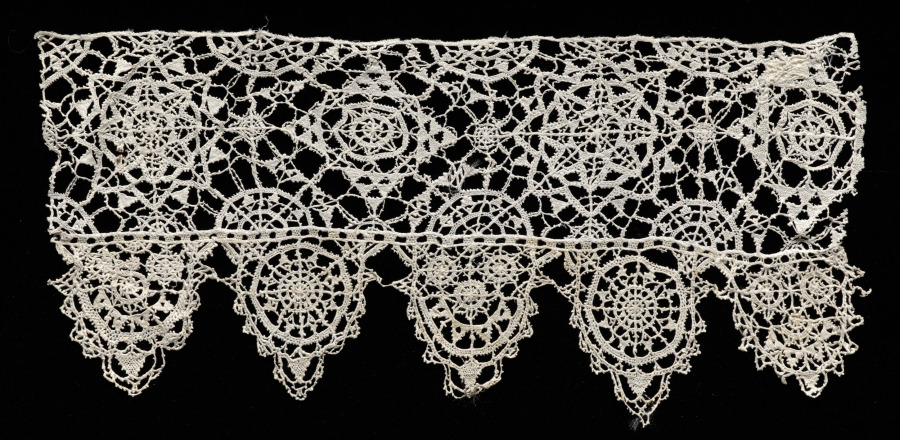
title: Lace Edging Fragment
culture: Italy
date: 1560–99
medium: Linen: needle lace (punto in aria)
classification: Lace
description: This edging fragment includes geometric designs within squares, an early type of Punto in aria.